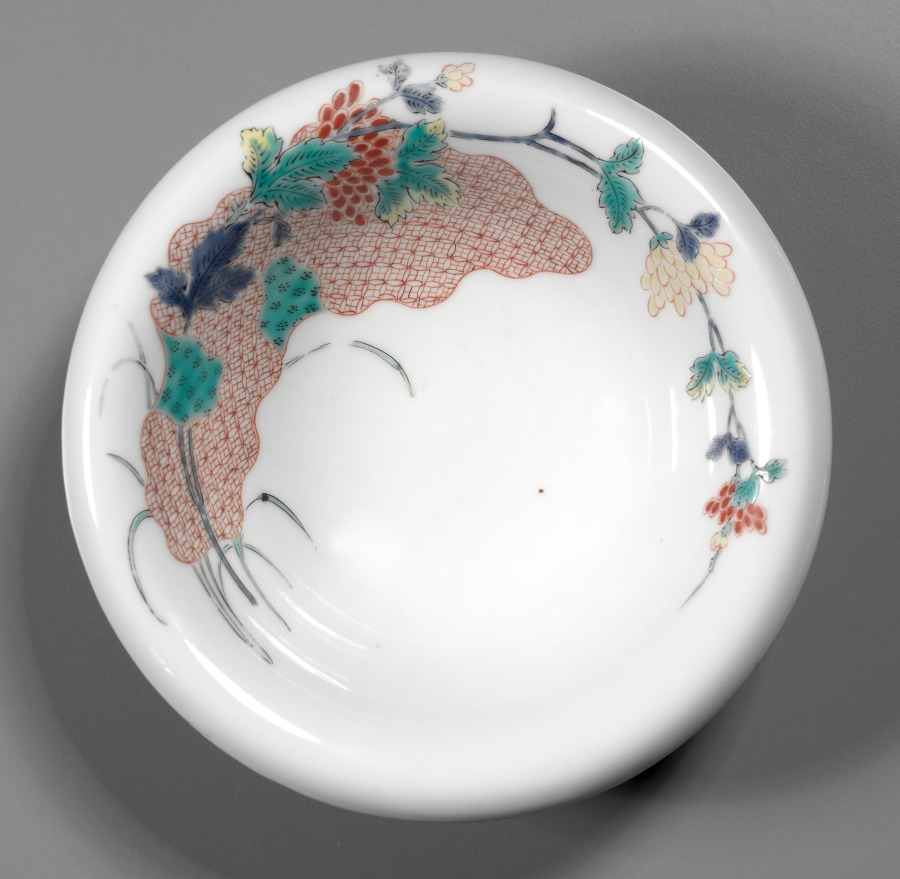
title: Bowls with Floral Sprays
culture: Japan, Edo period (1615–1868)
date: early 1700s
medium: two of a set of bowls; porcelain with overglaze color enamel (Hizen ware, Kakiemon type)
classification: Ceramic